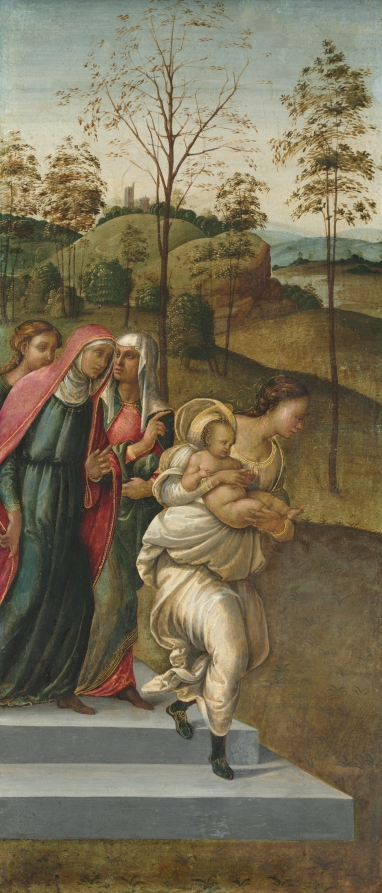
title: John the Baptist being carried to Zacharias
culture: Italy, 16th century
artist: attributed to Francesco Granacci (Italian, 1469–1543)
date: c. 1510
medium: tempera and oil with gold on wood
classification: Painting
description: Did Michelangelo paint some of this work? This panel formed part of a series depicting the life of John the Baptist, with other panels located in New York City and Liverpool, England. Scholars believe that as many as five artists may have participated in creating the artworks and disagree about who painted this panel. Michelangelo Buonarotti, a lifelong friend of Francesco Granacci’s, may have contributed, perhaps in the drapery of the figure in white.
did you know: The artist used gold to paint fine details of embroidery and individual strands of hair.